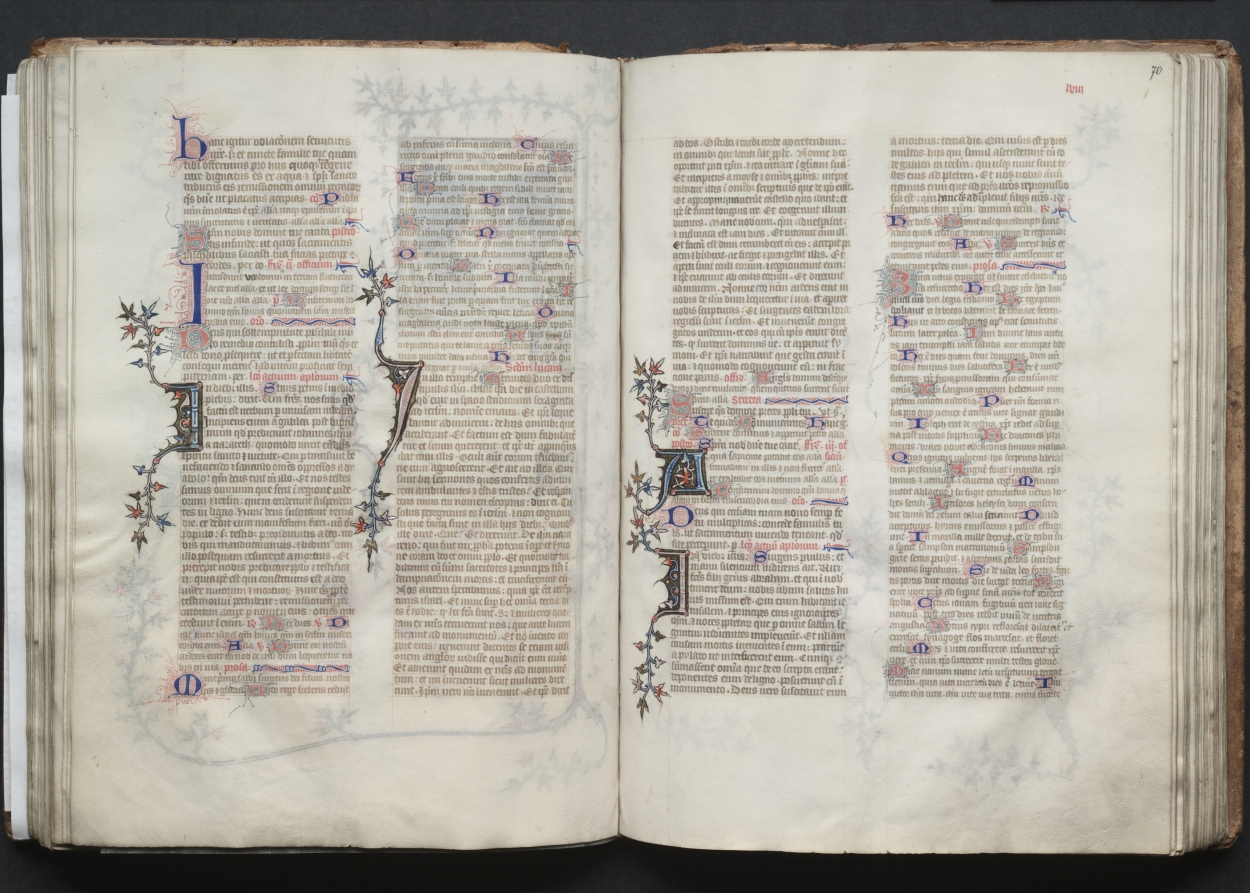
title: The Gotha Missal: Fol. 70r, Text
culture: France, Paris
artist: Master of the Boqueteaux (French)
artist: and Workshop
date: c. 1375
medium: ink, tempera, and gold on vellum; blind-tooled leather binding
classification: Bound Volume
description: The style and quality of this manuscript's decoration is typical of deluxe Parisian books made for aristocratic or royal patrons. Most of the book's decoration appears to be the work of the Master of the Boqueteaux, an artist active at the court of King Charles V (died 1380). His style was apparently shared by a number of book illuminators working in and around Paris. It is very possible that the Gotha Missal belonged to Charles V, but is not provable because the manuscript has no royal portraits and lacks a colophon. Given the book's magnificent decoration, however, it would seem that it was produced for a Valois prince, if not for the king himself. The manuscript receives its name from the German dukes of Gotha, its later owners.